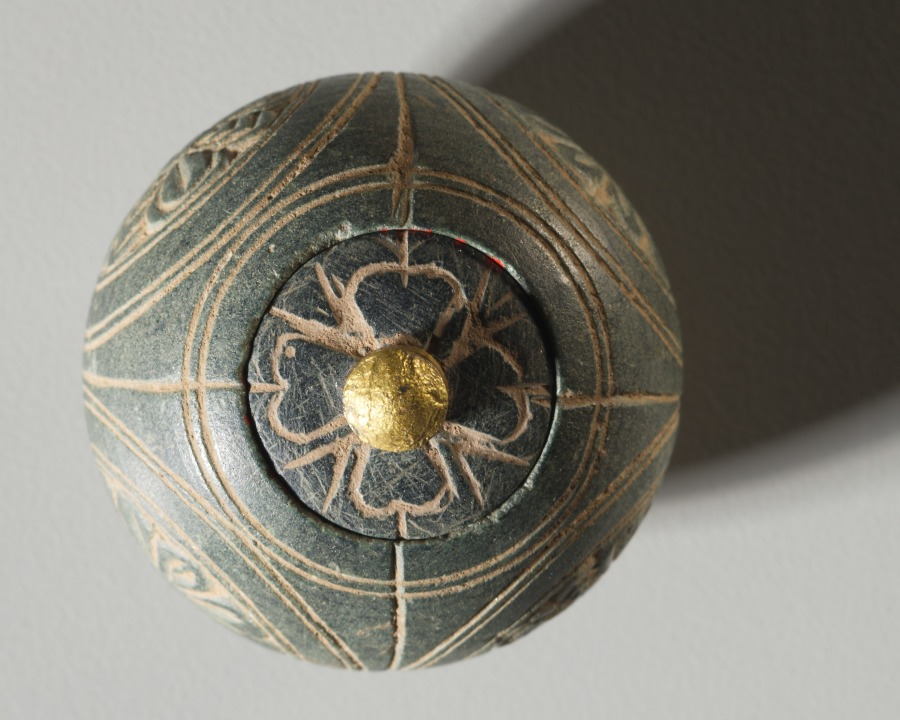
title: Miniature Stone Reliquary or Toilette Casket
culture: Pakistan, Gandhara, probably Sirkap, early Kushan period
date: 1–100 CE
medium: gray schist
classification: Sculpture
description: Tiny reliquaries holding the cremated remains of the Buddha or a high-ranking holy person empowered monuments and made them sacred. A Buddhist monument, such as the solid hemispherical mounds called stupas, would not be worshipped until it was consecrated with the relic secreted inside. Bits of ash were combined with tiny gems inside a crystal or glass reliquary, which was then placed inside a stone or metal container, like the lidded versions seen here. These containers look like cosmetic vessels for aromatic pastes used for perfume in ancient India. Buddhist texts state that the enlightened Buddha emitted a fragrance like sandalwood paste; the form of the reliquary as a perfume bottle indicates the presence of the Buddha by the visual reference to his pleasant scent. Once enclosed in the stupa the reliquaries would not be seen, but monks were tasked with applying sandalwood paste to the exterior of stupas as part of their regular maintenance to convey to visitors the ongoing presence of the Buddha radiating from the relic in the center.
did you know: The knob of the lid is gilded, as is the interior of the casket.